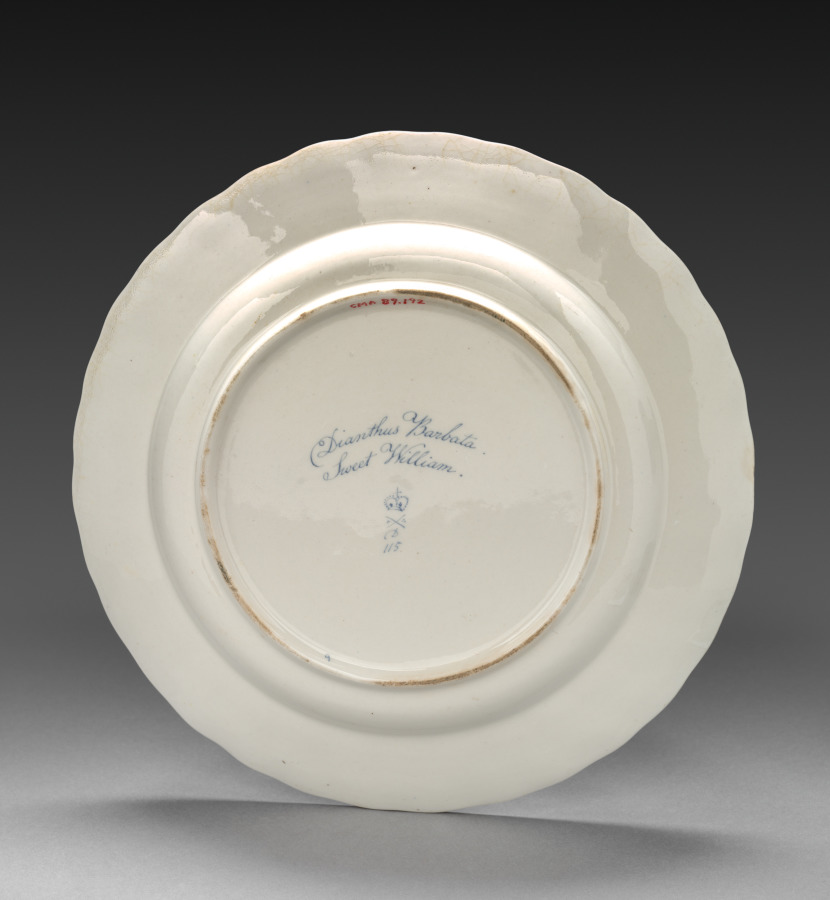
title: Plate from Dessert Service: Sweet William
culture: England, Derby, 18th century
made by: Derby (Crown Derby Period) (British)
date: c. 1800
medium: porcelain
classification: Ceramic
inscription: inscribed in blue on back: Dianthus Barbata./Sweet William./crown/crossed batons and dots/0/115. Near edge: 9.